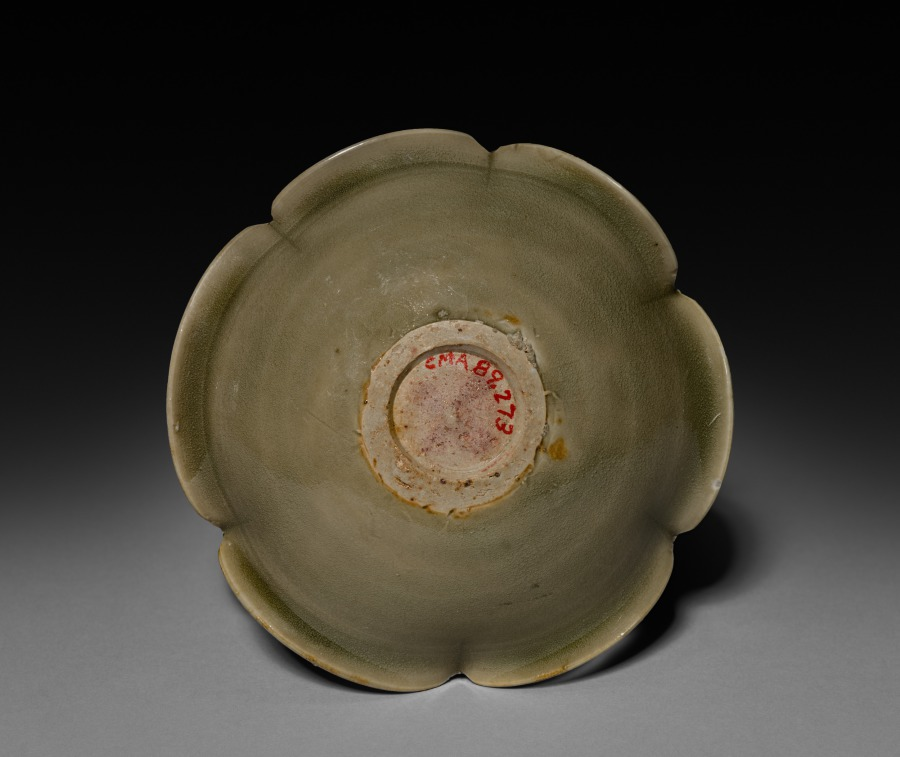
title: Foliated Saucer: Yaozhou Ware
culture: China, Shaanxi province, Northern Song dynasty (960-1127)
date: late 1000s-early 1100s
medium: glazed porcelain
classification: Ceramic